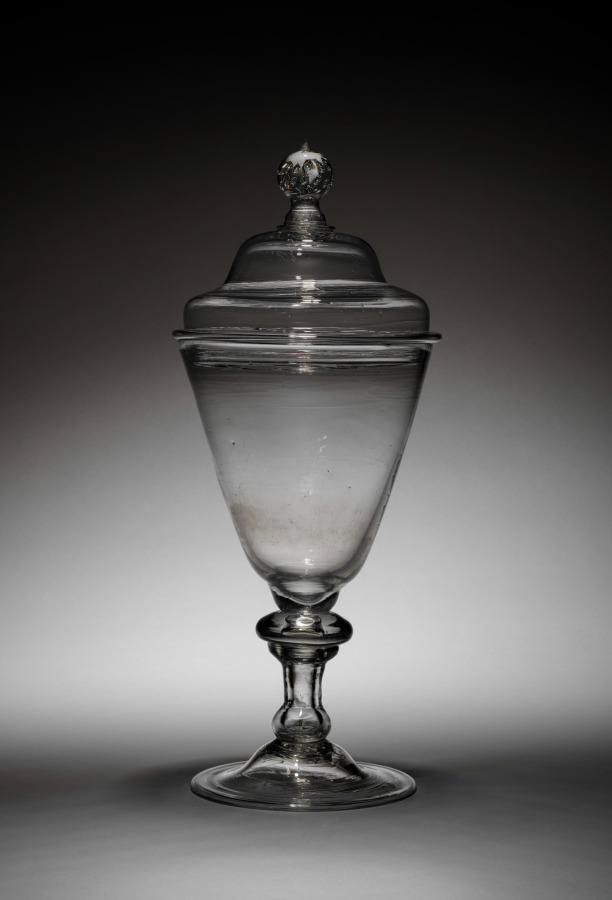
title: Flip Cup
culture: America, early 19th century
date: c. 1800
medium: glass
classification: Glass